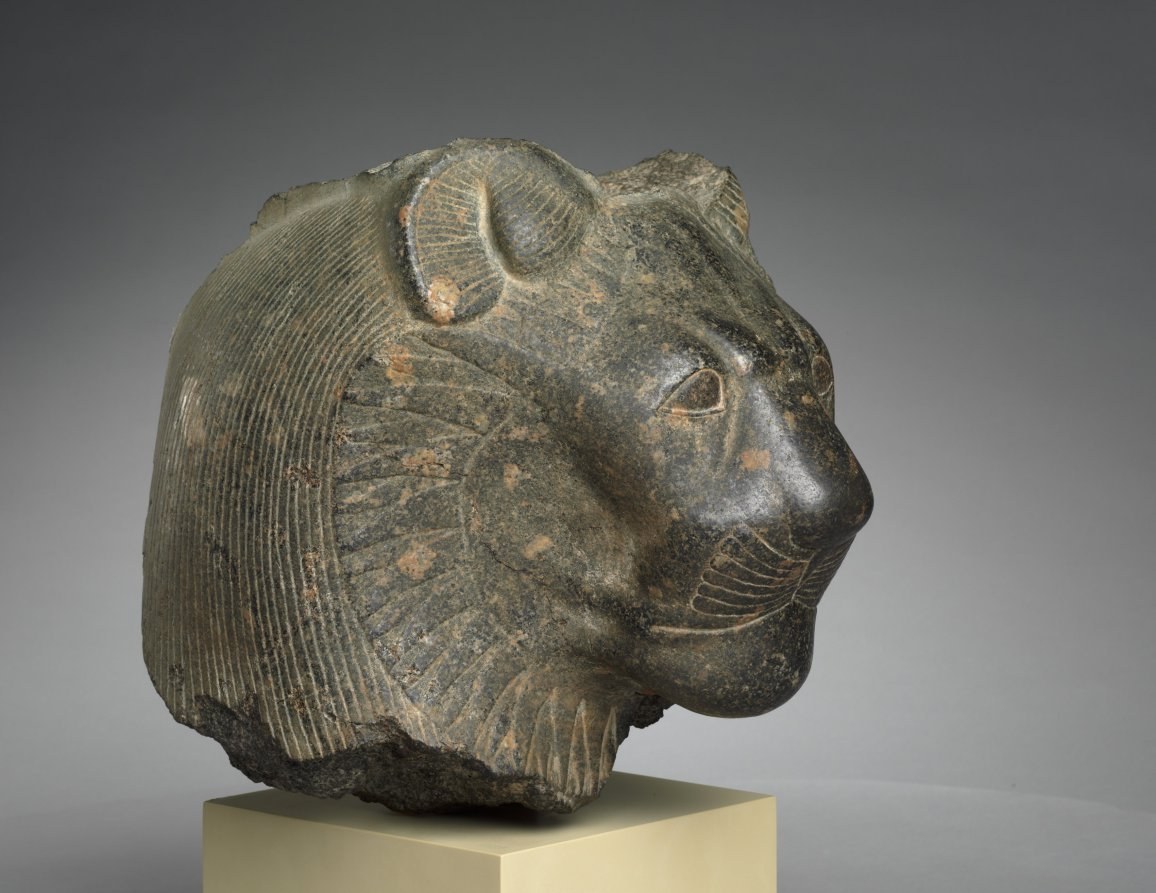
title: Head of Sekhmet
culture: Egypt, Thebes(?), New Kingdom (1540–1069 BCE), Dynasty 18, reign of Amenhotep III (1390–1352 BCE)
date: c. 1391–1353 BCE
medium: granodiorite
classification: Sculpture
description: This lioness head once belonged to a grand statue of the goddess Sekhmet, "the powerful one," probably seated and wearing a tight dress. Possibly appealing to her healing aspect, Pharaoh Amenhotep III, often described as “beloved of Sekhmet,” commissioned and dedicated hundreds of large granodiorite Sekhmet sculptures in his Theban mortuary temple. Thus, this head likely comes from Thebes, perhaps later moved across the Nile—like many such sculptures—to the temple of Mut, a related deity, at Karnak. Behind her stylized ruff, Sekhmet wears a wig, once crowned with a sun disk and uraeus, the stylized cobra symbolizing royal or divine power.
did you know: Amenhotep III may have dedicated 730 statues of Sekhmet, two for each day of the year.